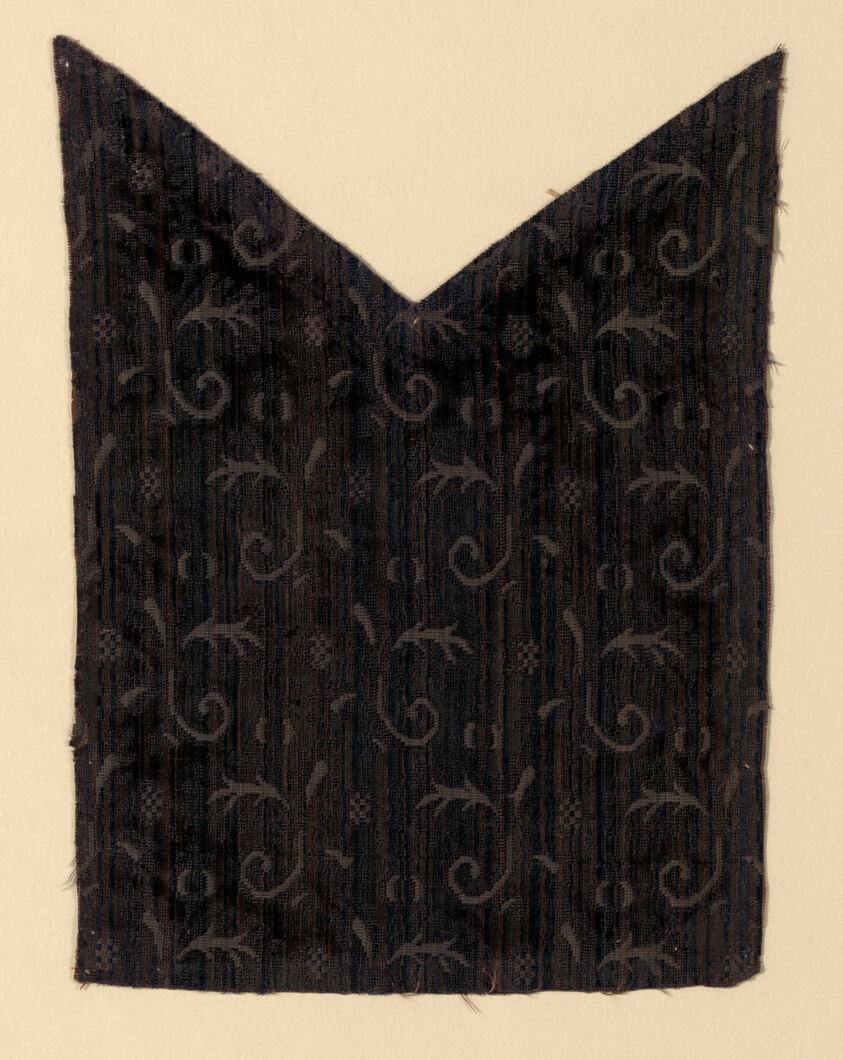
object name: Textile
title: Fragment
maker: Italy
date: 1601/50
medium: Silk, plain weave with supplementary pile warps forming cut, uncut, and voided velvet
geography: Italy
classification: textile; weaving - velvet